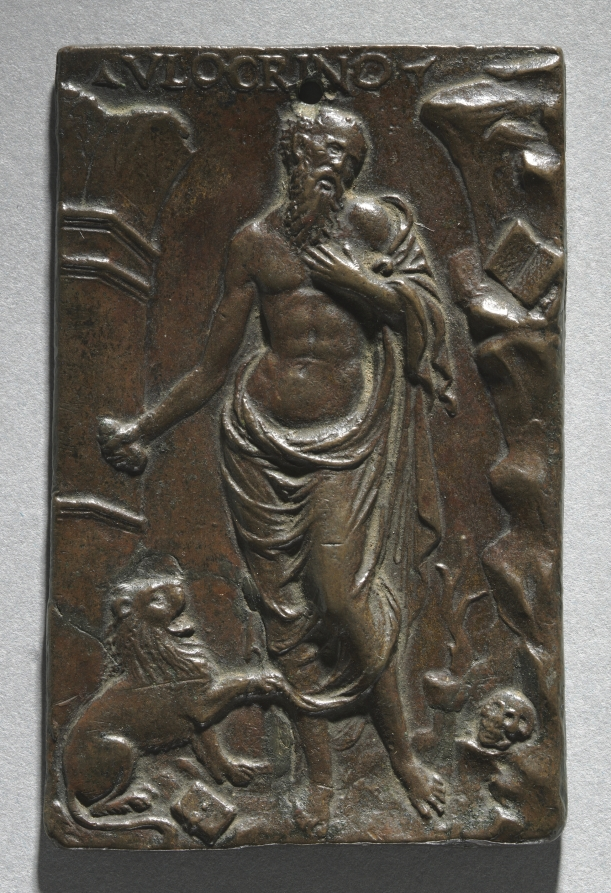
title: Saint Jerome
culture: Italy, Padua?, 16th century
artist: cast after a model by Ulocrino (Italian)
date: 1500s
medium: bronze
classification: Sculpture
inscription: inscribed across top: VLOCRINO.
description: During the Renaissance, humanist scholars sought to revive not only the Greek and Roman past, but also the early Christian era. Among the most fully studied figures of Christian antiquity was Saint Jerome, whose letters were widely read and vividly describe his physical and spiritual trials in the Syrian desert. Here Jerome appears in such a setting between a broken classical arch and rocky cliff, on the ledges of which are an open book and skull. In his extended right hand he holds a stone that he used to beat his breast while living as an ascetic. In the lower left corner a lion, the legendary companion of the saint, sits beside a closed book. The inscribed signature Ulocrino appears on a number of plaquettes in the early 1500s that stylistically relate to the work of Paduan sculptors from this period. Attempts to identify this artist have prompted a number of proposals: the most intriguing suggests that "Ulocrino" is a pseudonym made from the Greek oulos and the Latin crinis, meaning curly-haired, for Andrea Briosco, better known by the nickname Riccio on account of his wavy hair. Riccio was one of the most renowned Paduan bronze sculptors of the 1500s.